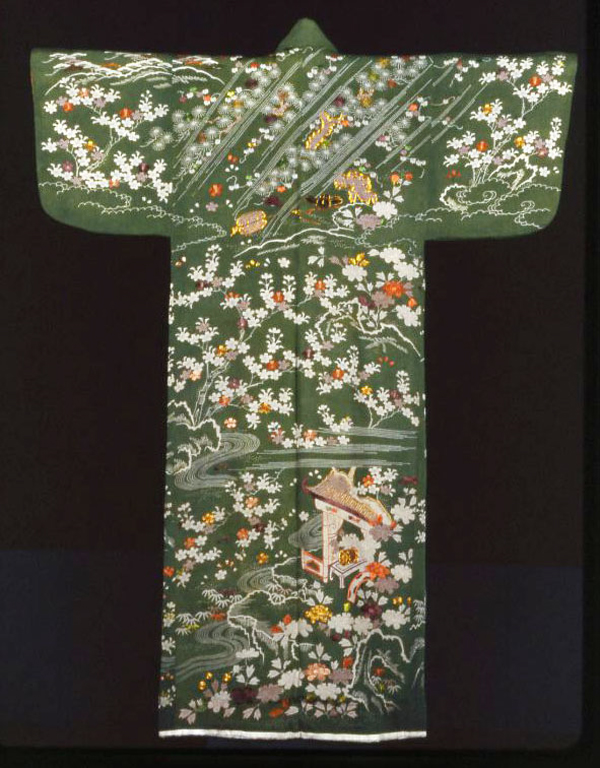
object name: Textile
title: Kosode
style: edo (japanese period), meiji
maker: Japan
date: Edo period (1615–1868), 1775/1825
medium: Silk, plain weave, creped wefts (chirimen); paste-resist dyed (yuzen); embroidered with silk and gold-leaf-over-lacquered-paper-strip-wrapped cotton in satin, single satin, and stem stitches; couching; lined with silk, plain weave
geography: Japan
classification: textile; needlework (visual works); costume